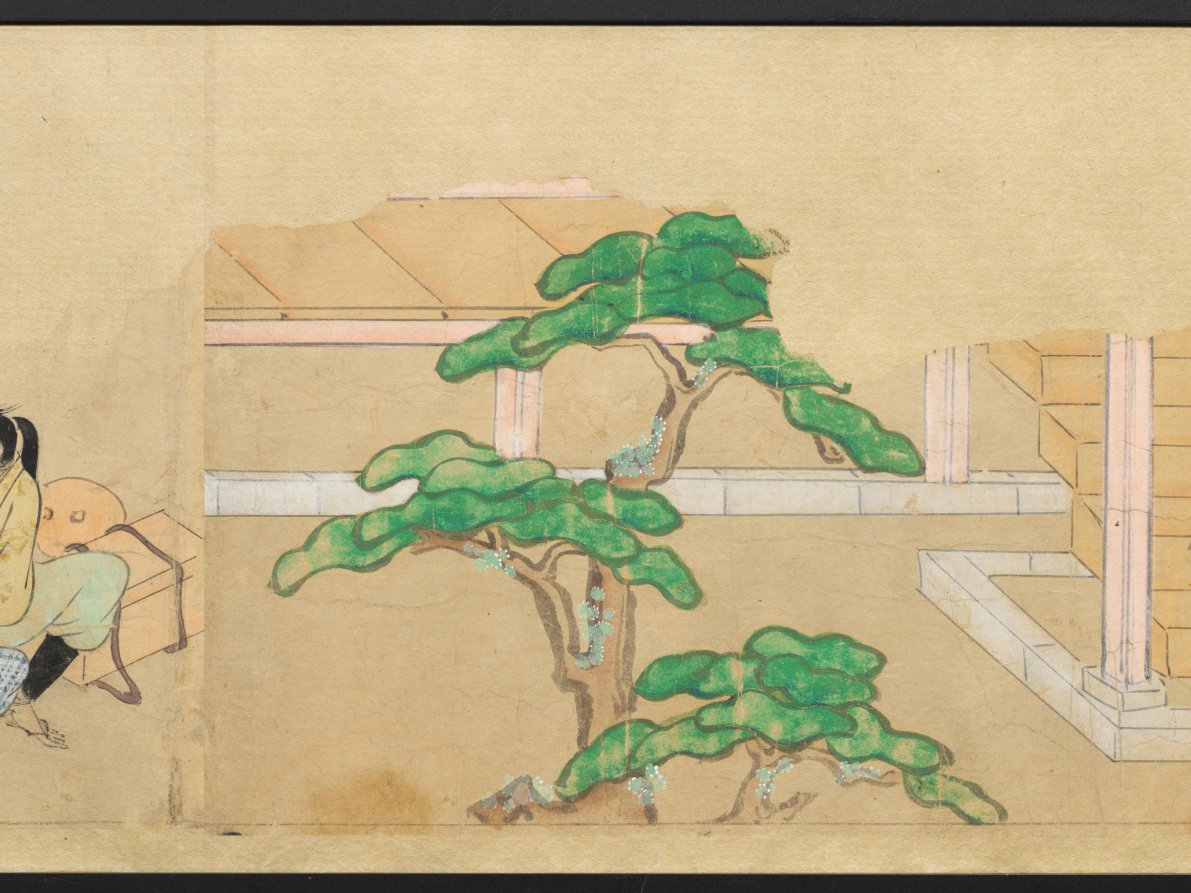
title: The Saltmaker's Story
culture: Japan, Edo period (1615–1868)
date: early 1600s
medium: One of a pair of handscrolls; ink, color, and gold on paper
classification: Painting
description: Once read and copied by girls at New Year’s celebrations and included in dowries, The Saltmaker’s Story is a rags-to-riches tale in which daughters are gifts from the gods. Despite his simple outlook, the main character progresses from humble roots as an associate at Kashima Shrine to the elite status of grandfather of the emperor through the intervention of the Kashima deity. The Saltmaker’s Story is traditionally presented in a set of three scrolls, but the text of this set has been removed by a previous owner, who remounted the illustrations as a pair. The paintings of this one take us from right to left through the second half of the tale.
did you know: This handscroll originally had texts before its paintings, but the texts were removed.